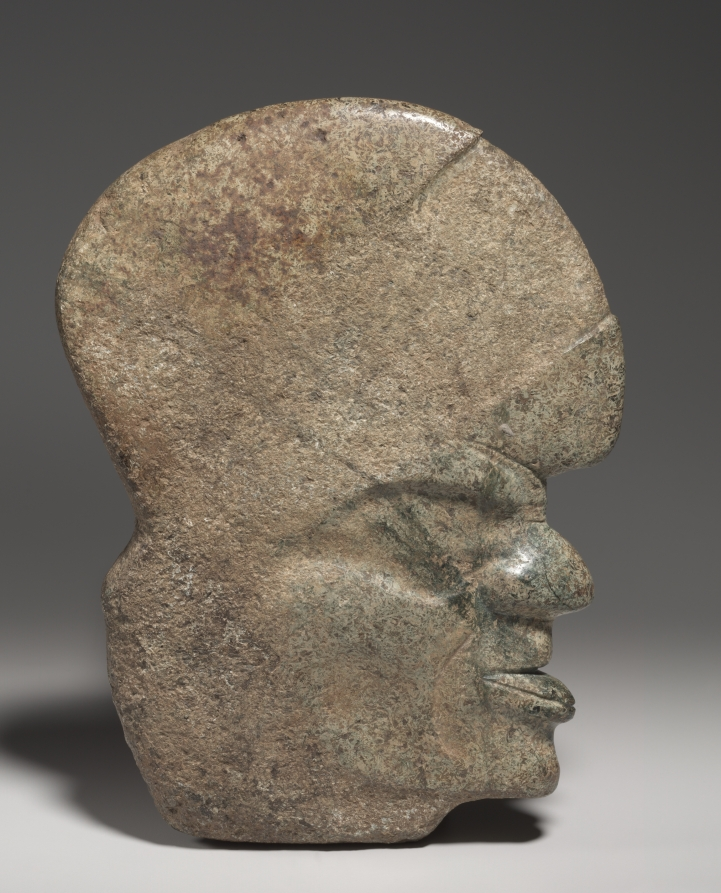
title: Ballgame Thin Stone Head (Hacha)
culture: South or southeast Mesoamerica, Classic Veracruz style (600-1100)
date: 600–900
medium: stone, pigment traces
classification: Sculpture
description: In contrast to other ballgame sculptures on display, it seems unlikely that thin stone heads, known as hachas, are renditions of actual ballgame gear. Their use remains unclear, but the notch at the back of most examples suggests they might have served as architectural ornaments during play or game ceremonies. Also, in a few artistic depictions of game ceremonials, such heads rest upon U-shaped hip protectors, like one nearby.